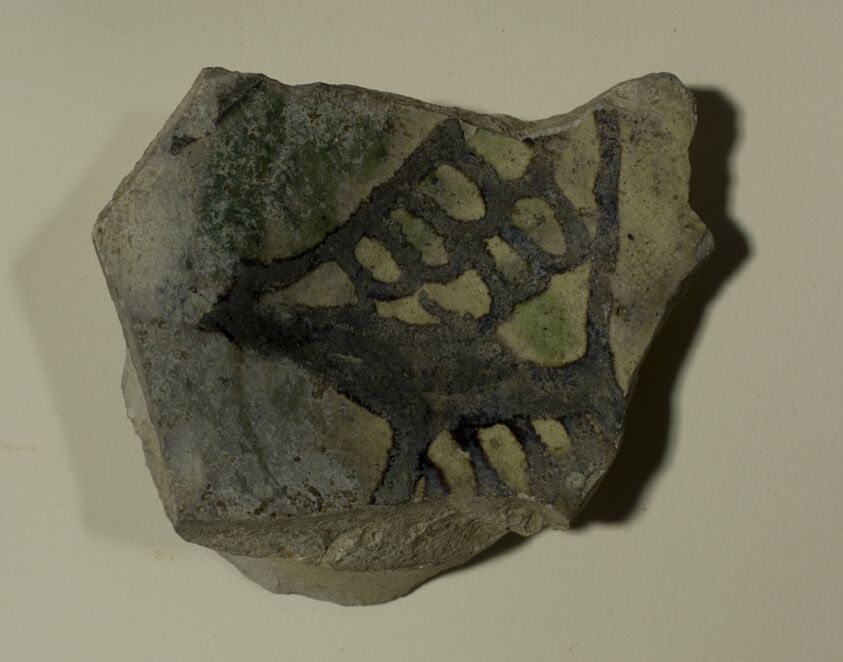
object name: Decorative Arts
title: Fragment of a Bowl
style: byzantine, european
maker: Byzantine (Greece, Cyprus)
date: 13th-14th century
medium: Ceramic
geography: Istanbul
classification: fragment; ceramics; vessel; bowl; asian art; decorative arts